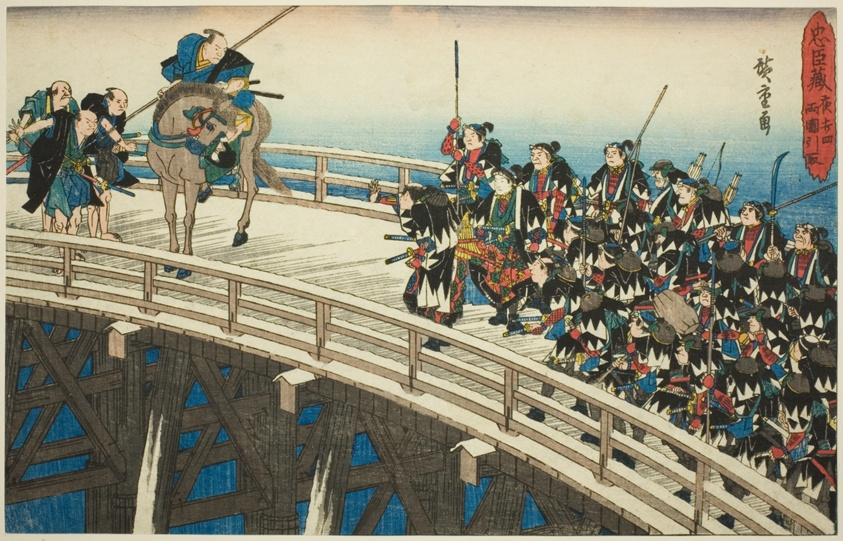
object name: Print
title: The Night Attack, Part 4 [sic; actually 5]: The Retreat across Ryogoku Bridge (Youchi yon, Ryogoku hikitori), from the series "The Revenge of the Loyal Retainers (Chushingura)"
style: Japanese (culture or style)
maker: Utagawa Hiroshige 歌川 広重; Japanese, 1797-1858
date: c. 1834/39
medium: Color woodblock print; oban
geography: Japan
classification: woodblock print; print; asian art